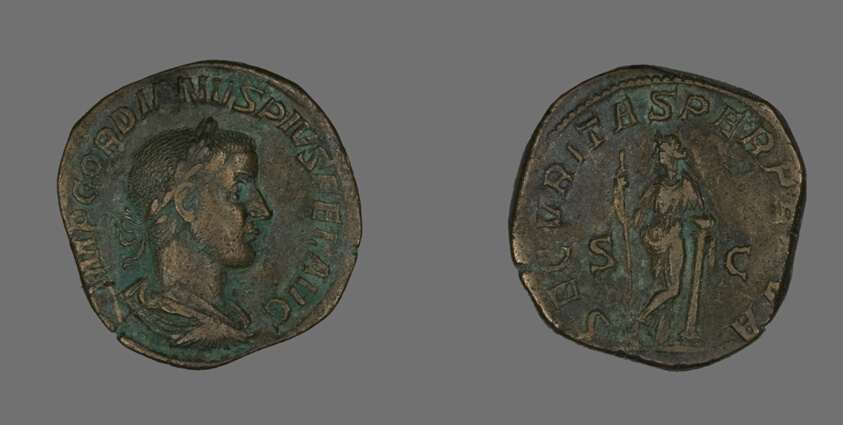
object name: Coin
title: Sestertius (Coin) Portraying Emperor Gordianus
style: roman (ancient, style or period), ancient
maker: Roman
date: 238-244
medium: Bronze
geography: Roman Empire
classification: coin; ancient art